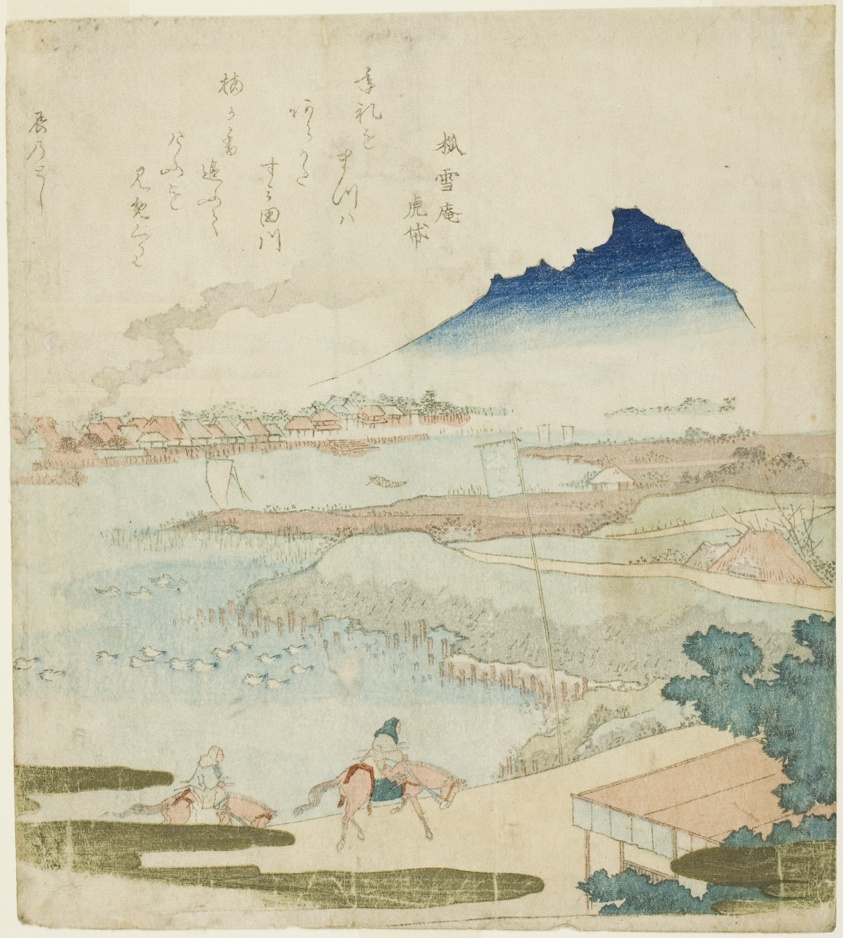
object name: Print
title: View of the Sumida River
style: Japanese (culture or style)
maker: Totoya Hokkei (Japanese, 1780–1850)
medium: Color woodblock print; shikishiban, surimono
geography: Japan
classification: woodblock print; print; asian art